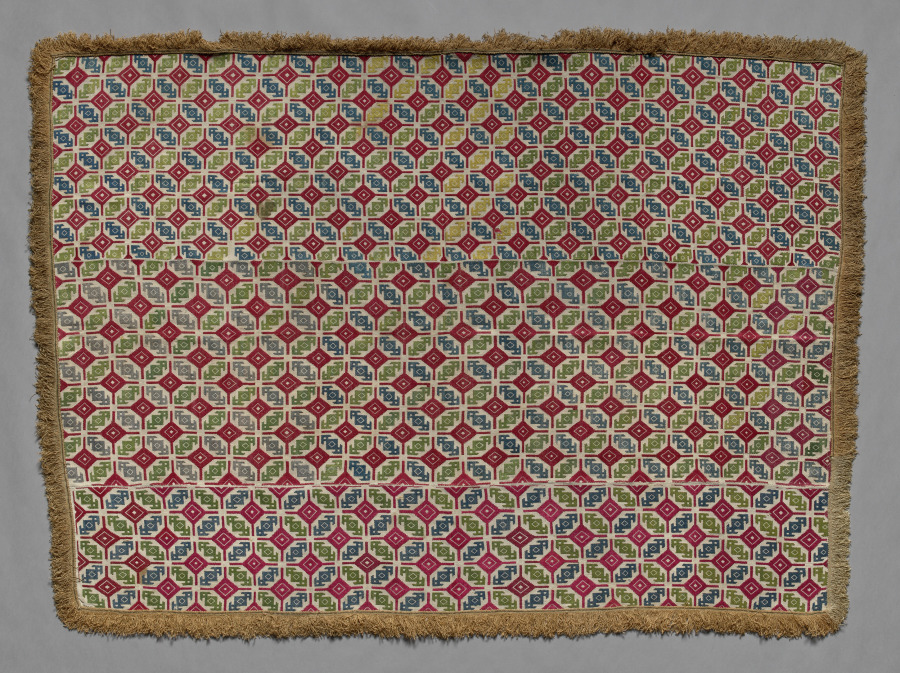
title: Bedspread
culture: Greece, Cyclades Islands, Naxos, 19th century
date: 1800s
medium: embroidery: silk on linen tabby ground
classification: Embroidery